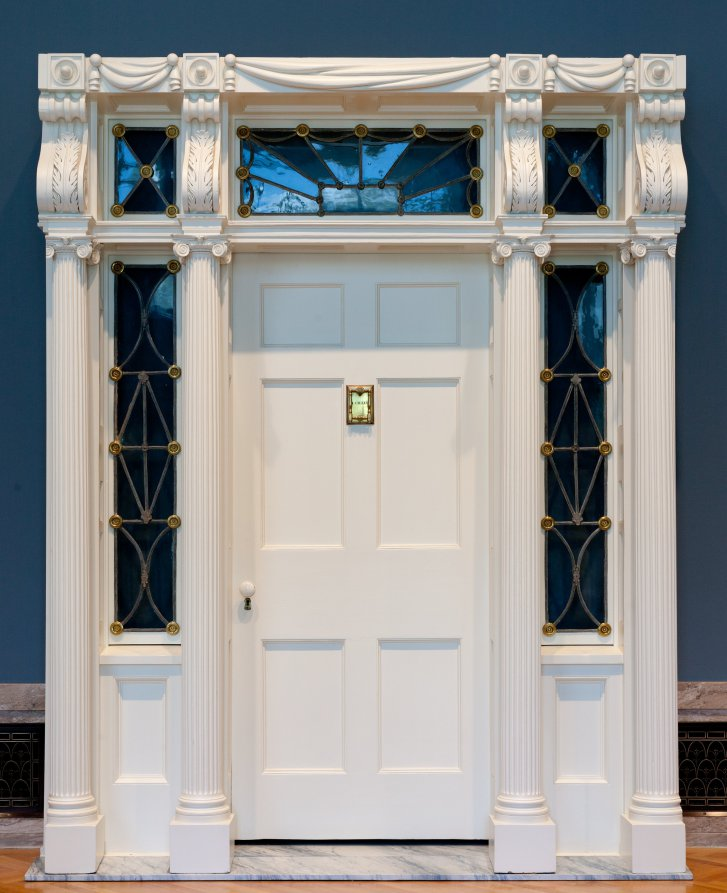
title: Doorway from the Isaac Gillet House, Painesville, Ohio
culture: America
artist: Jonathan Goldsmith (American, 1783–1847)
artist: and Lewis Firm (American)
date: 1821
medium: wood, leaded panes, and brass decoration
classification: Furniture and woodwork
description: This elaborate doorway originally came from a house designed and built by Jonathan Goldsmith, one of the most celebrated early architects of Northeastern Ohio. Goldsmith, who was born in Connecticut and trained in Massachusetts, came to the area around 1802 and brought with him a knowledge of the prevailing classical styles in architecture and decoration. This doorway formed the most decorative element of the front of the Isaac Gillet House and features elements of both Greek (boldly carved acanthus leaves and swags) and Roman (tall, thin columns and flat window tracery) architecture.